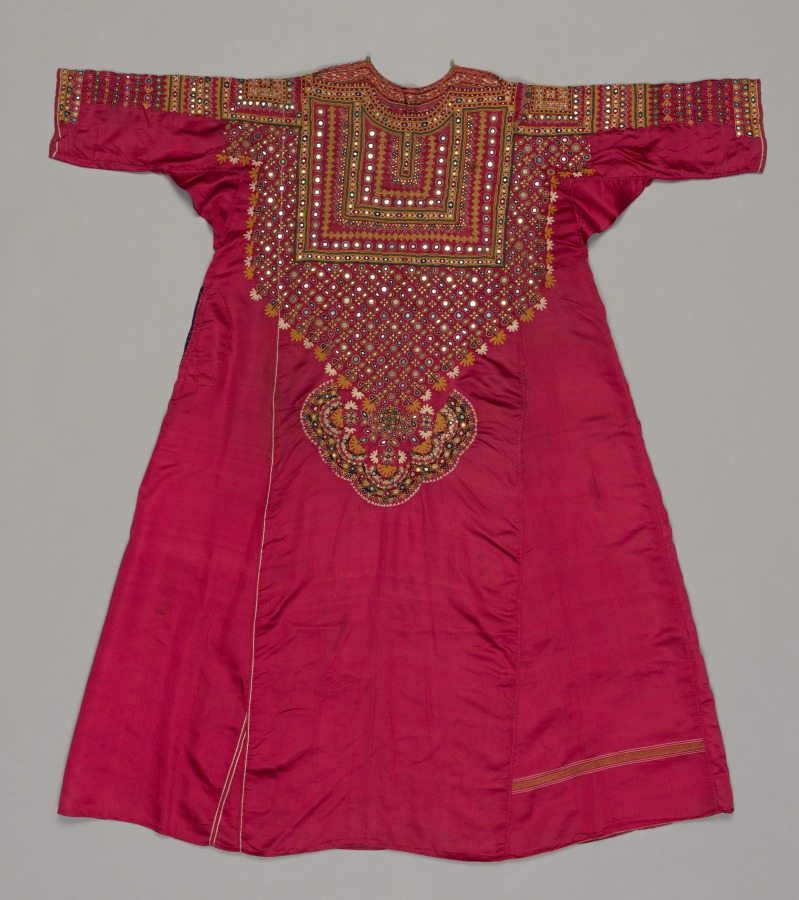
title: "Aba": Woman's Dress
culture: Western India, Gujarat, Kachchh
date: late 1800s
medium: silk on silk satin with mirror-glass inserts, embroidery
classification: Garment